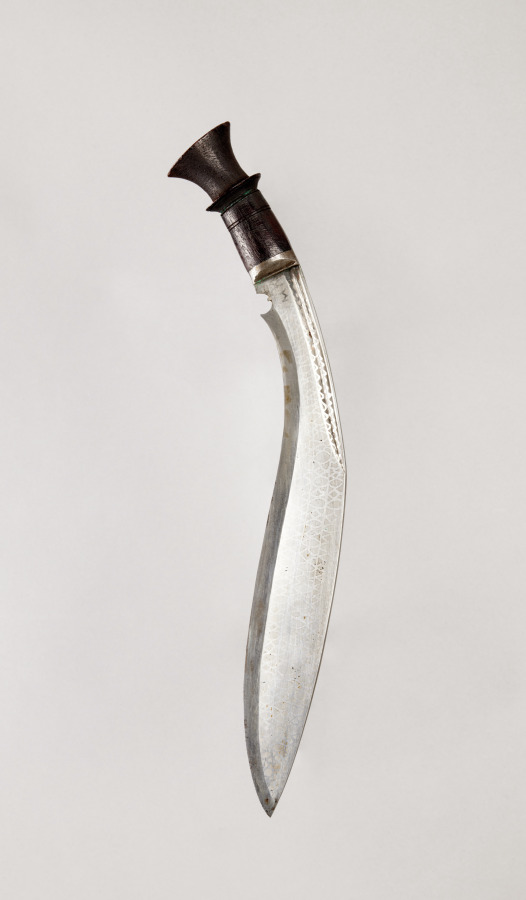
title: Knife (Kukri)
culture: Nepal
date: c. 1750–1800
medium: steel with etched surface and wooden handle, leather covered scabbard with brass mounts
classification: Arms and Armor